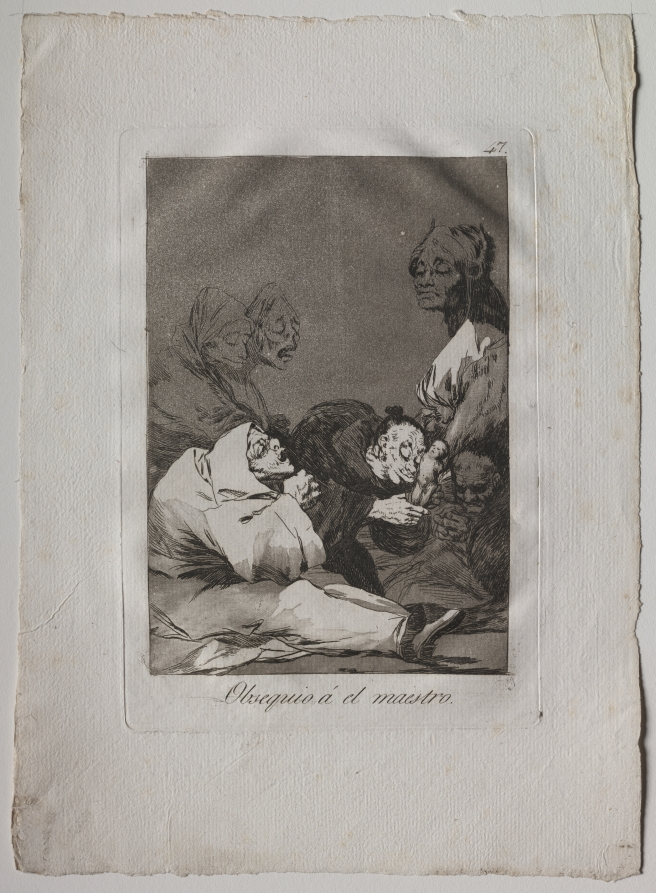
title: A Gift for the Master, Plate 47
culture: Spain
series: Los Caprichos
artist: Francisco de Goya (Spanish, 1746–1828)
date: 1799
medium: etching and aquatint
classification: Print